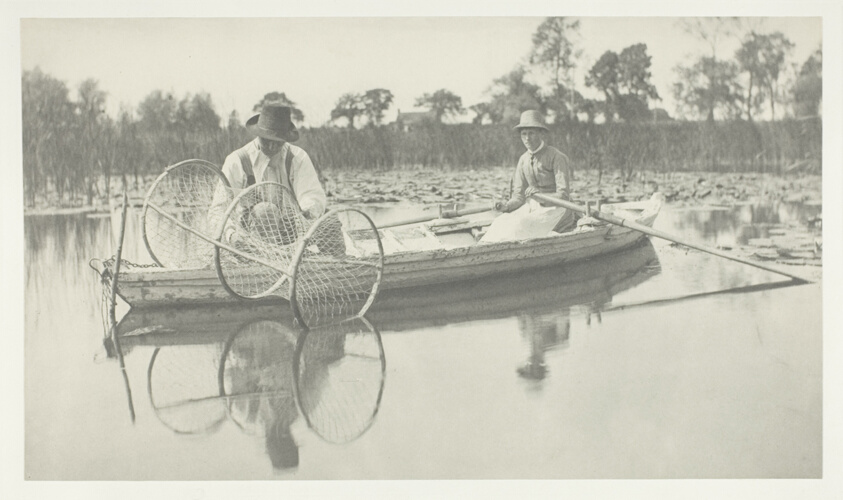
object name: Photograph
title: Setting the Bow-Net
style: 19th century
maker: Peter Henry Emerson (English, born Cuba, 1856–1936)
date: 1886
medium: Platinum print, pl. II from the album "Life and Landscape on the Norfolk Broads" (1886)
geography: England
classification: platinum print; photographic process; photography; photograph